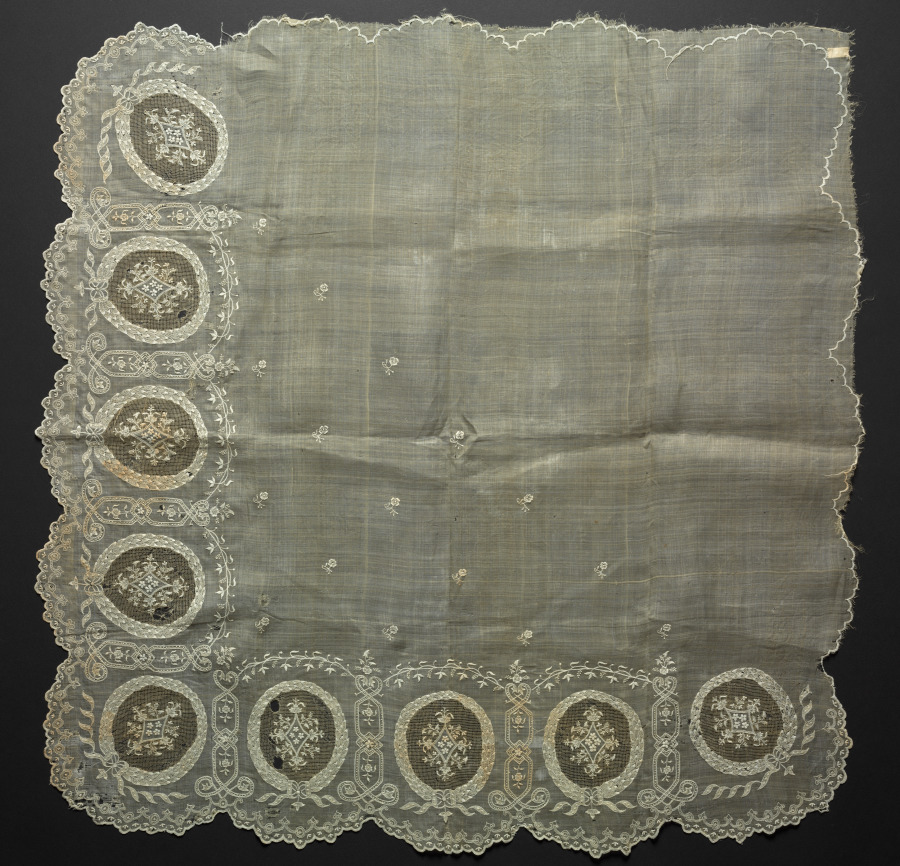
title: Lace Fichu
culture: Philippines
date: 1800s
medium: Plain weave piña cloth: needle lace and embroidery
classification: Embroidery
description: This square textile is made of fine piña fiber in plain weave. Two edges are finished with wide hand-embroidered cotton borders composed of oval medallions enclosing floral motifs, linked by scroll and leaf elements, and completed with a scalloped outer edge. The placement of embroidery on only one half suggests folding, consistent with this textile’s possible use as a fichu.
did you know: A fichu is a large, square kerchief worn by women to fill in the low neckline of a bodice.